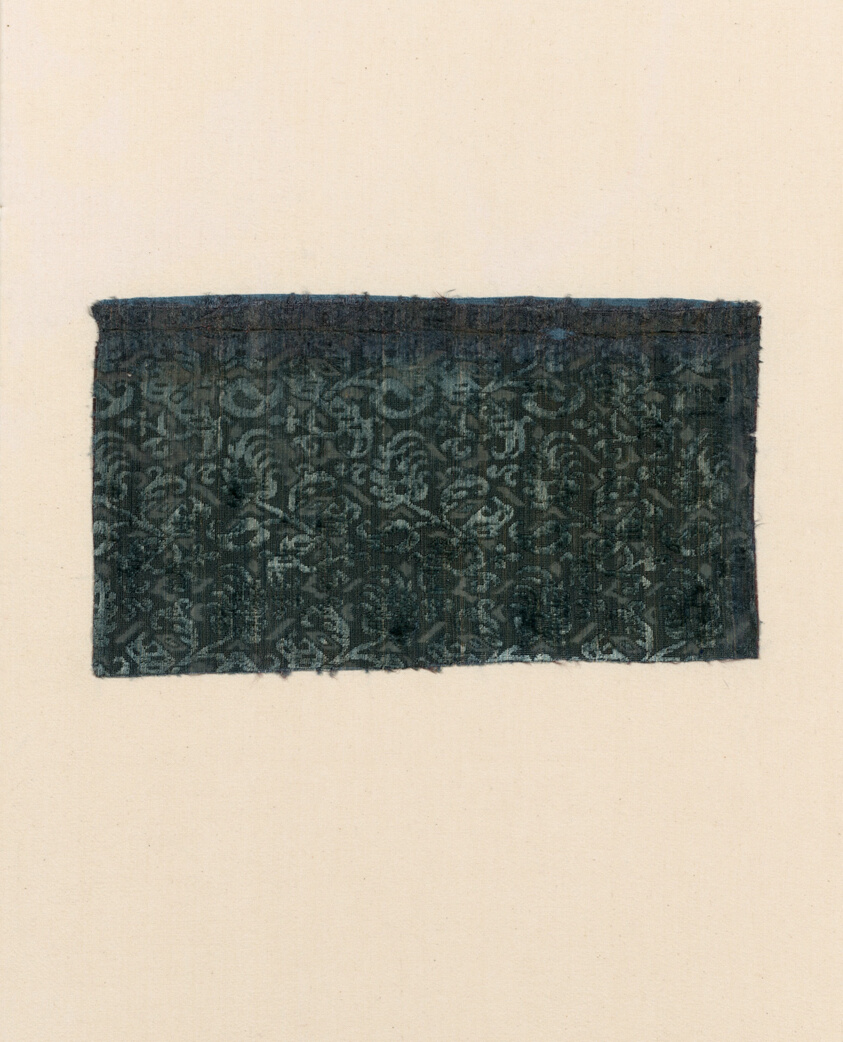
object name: Textile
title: Fragment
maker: Italy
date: 1601/75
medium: Silk, plain weave with supplementary pile warps forming cut, uncut, and voided velvet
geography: Italy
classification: textile; weaving - velvet